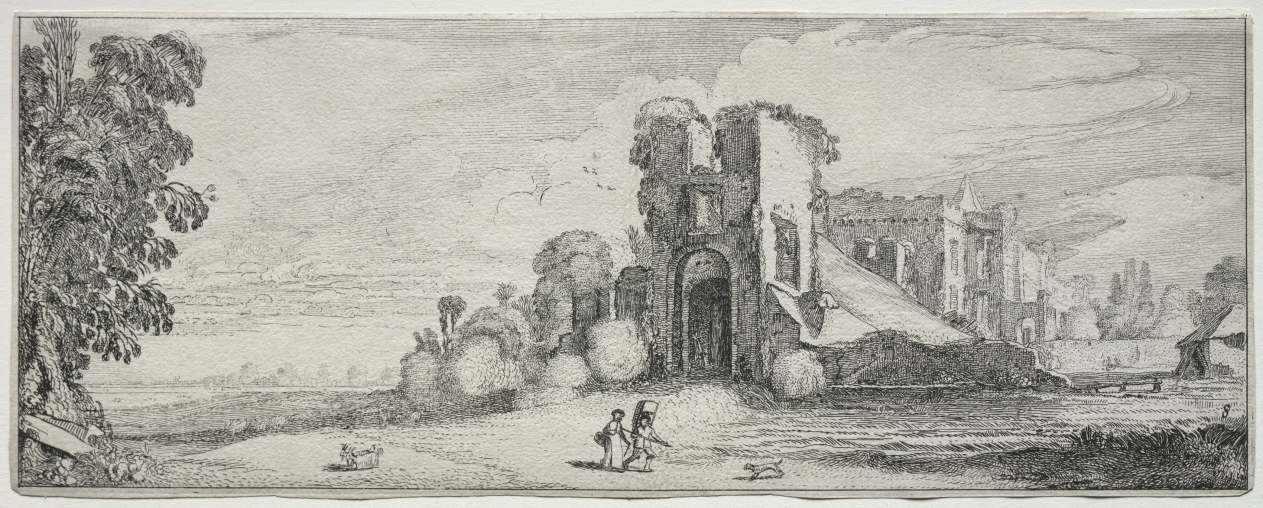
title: Some Pleasing Landscapes and Ruins of Ancient Monuments: Brederode Castle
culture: Netherlands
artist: Jan van de Velde II (Dutch, 1593–1641)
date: 1615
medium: etching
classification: Print